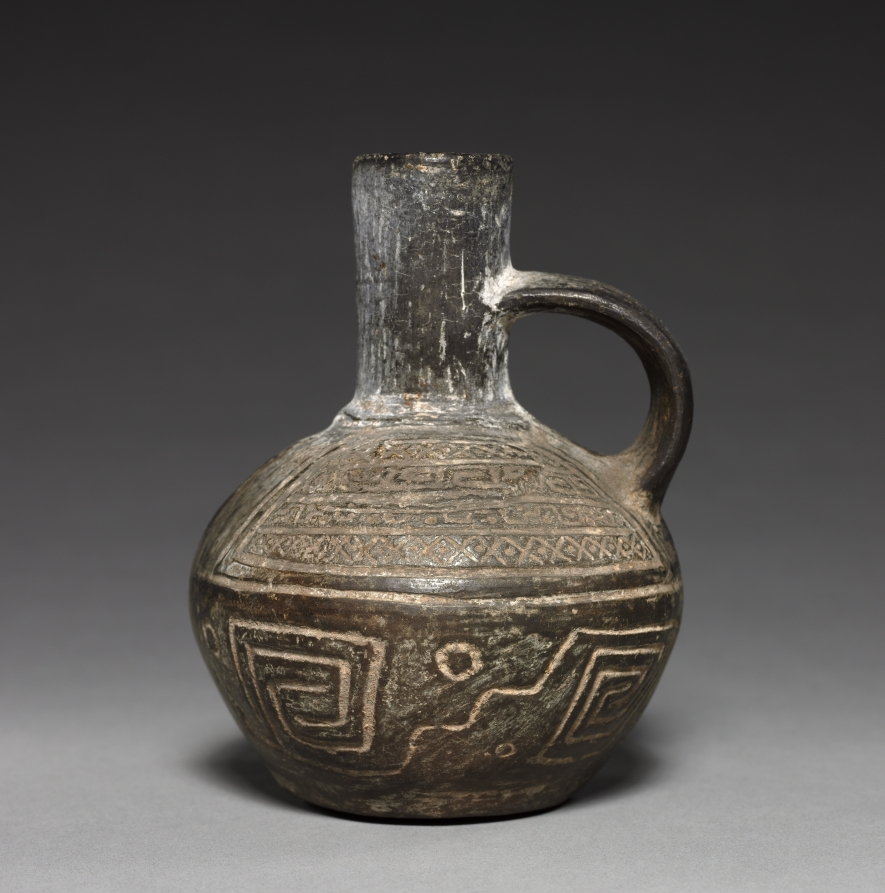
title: Bottle Vase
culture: Peru, Chimú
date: 1200–1400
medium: black ware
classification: Ceramic